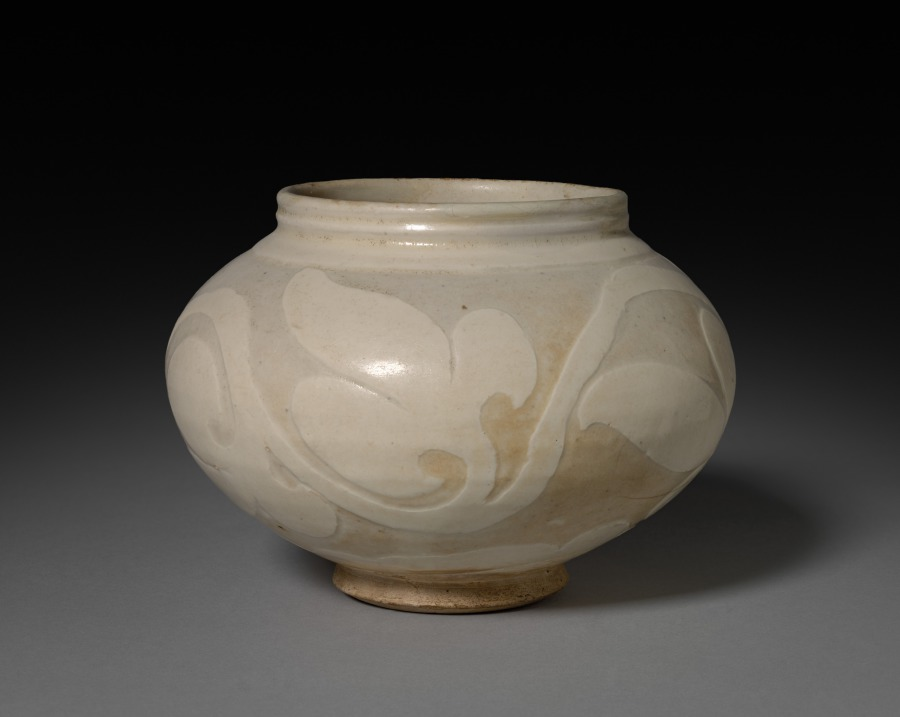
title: Jar: Cizhou ware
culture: China, Northern Song dynasty (960-1127) - Jin dynasty (1115-1234)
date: 12th-13th Century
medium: glazed light gray stoneware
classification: Ceramic